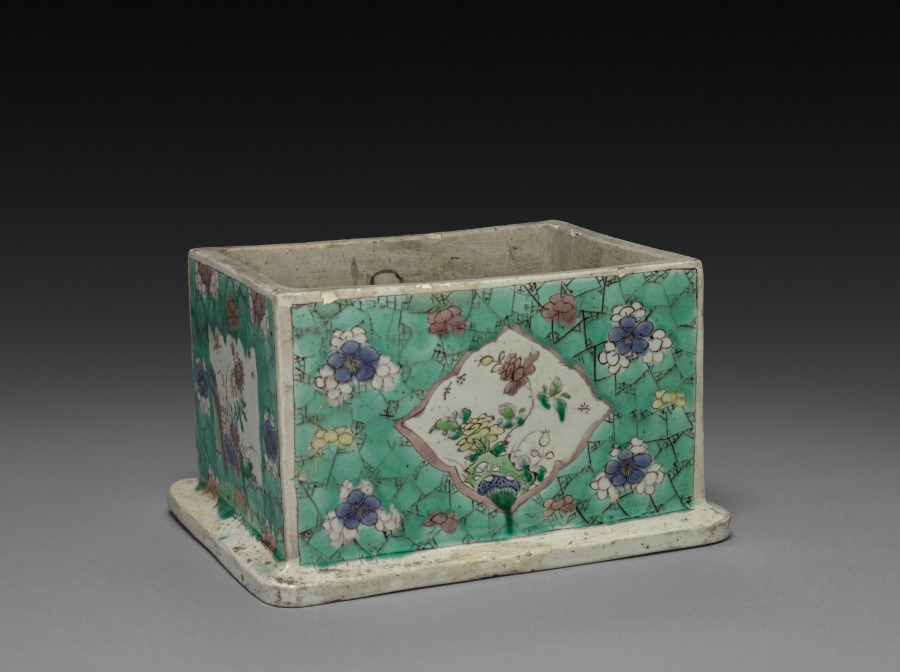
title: Lion (base)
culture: China, Qing dynasty (1644-1911), Kangxi reign (1661-1722)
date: 1662–1722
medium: porcelain with overglaze enamel decoration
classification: Sculpture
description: This porcelain lion is a pair with 1930.642. This lion holding a ball is considered male, while the nurturing female is depicted with a cub. Guardian lions were traditionally placed in front of buildings to protect from harmful spiritual or human forces.